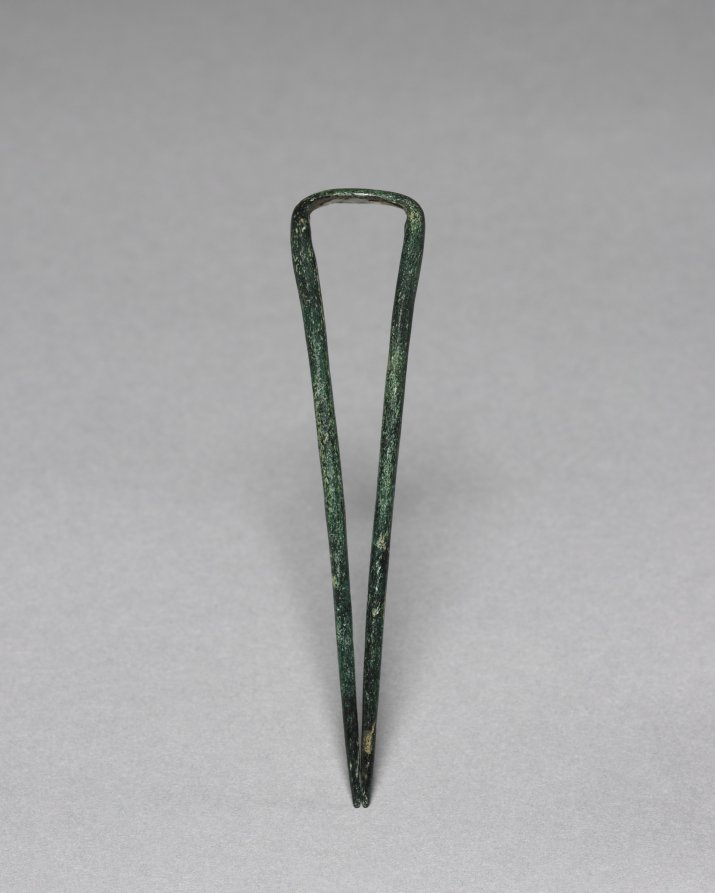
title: Bronze Topknot Pin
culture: Korea, Goryeo dynasty (918–1392)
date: 918–1392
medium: bronze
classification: Metalwork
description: Metallurgy advanced remarkably in the Goryeo period (918-1392), explaining why a large quantity of sophisticated metal artifacts were used not only as daily accessories but also as burial goods. Men put their hair in a knot at the top of their heads. To keep their long hair from falling, a bronze pin such as this one was used.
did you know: This bronze hairpin was for a man to fix his topknot.